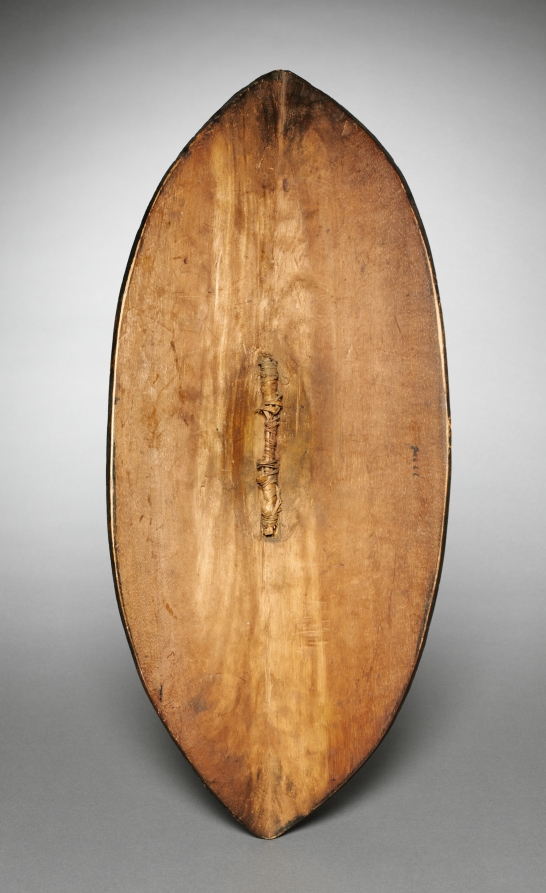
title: Shield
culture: Eastern Africa?, Uganda (?), early 20th century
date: early 1900s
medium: Wood, paint, and cord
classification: Arms and Armor